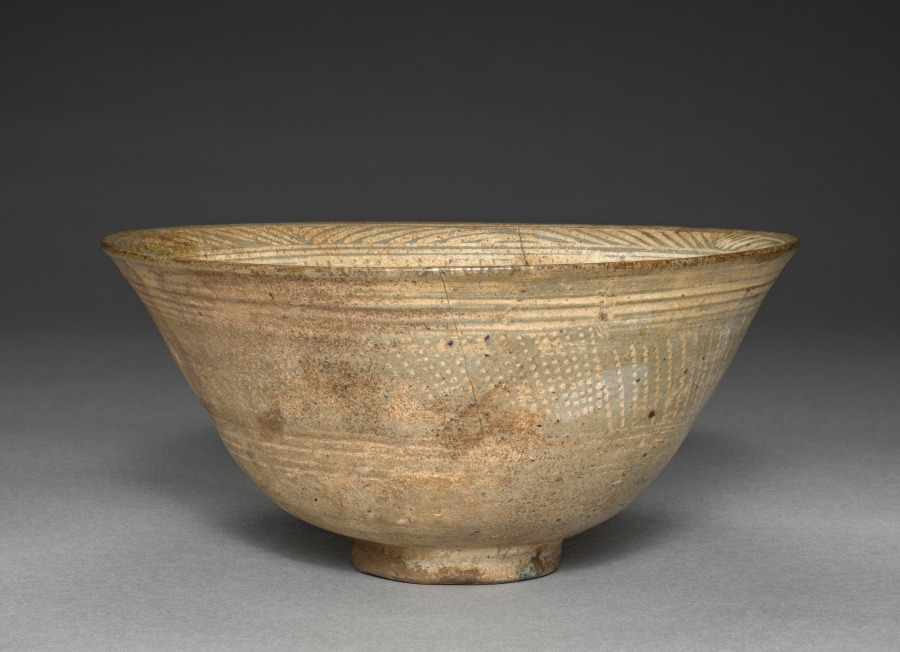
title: Bowl with Stamped Floral Decoration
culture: Korea, Joseon dynasty (1392–1910)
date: 1600s–1700s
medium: glazed ceramic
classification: Ceramic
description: This type of wide-mouthed bowl was used everyday in Korea, not exclusively for tea drinking. But when it was introduced to Japan around the early 16th century, its imperfect appearance evoking the aesthetics of wabi-sabi caused it to be repurposed as tea bowls in Japan. Possibly produced in one of the kilns established by the trading office (Waegwan) in Busan, southern Gyeongsang province, this type of bowl was sold to Japanese elite collectors.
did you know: This type of humble tea bowl was highly praised among Japanese collectors for its imperfect beauty.